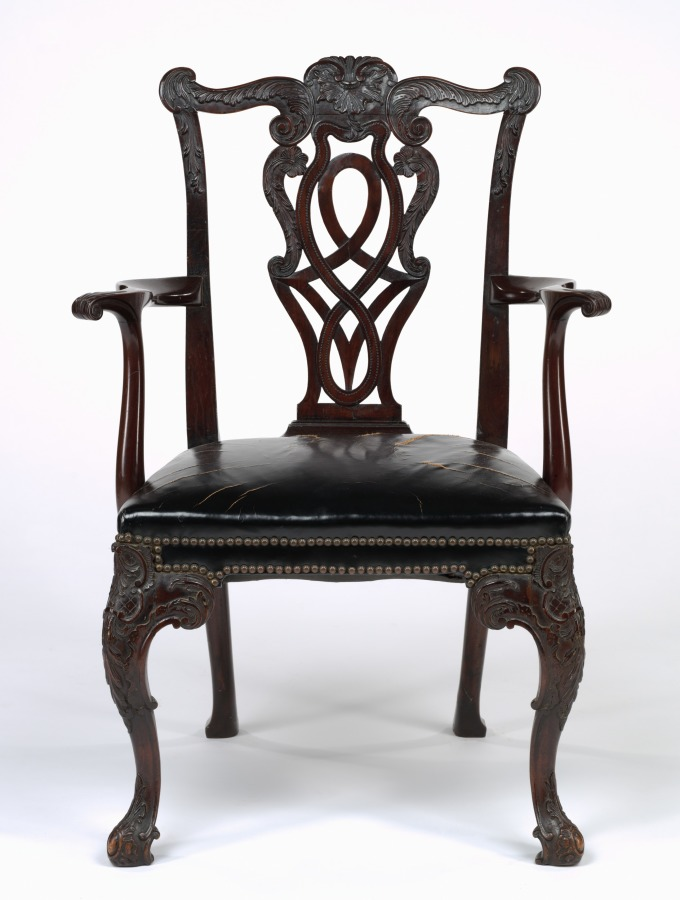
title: Armchair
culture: America, New York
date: c. 1875–80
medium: mahogany, leather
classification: Furniture and woodwork